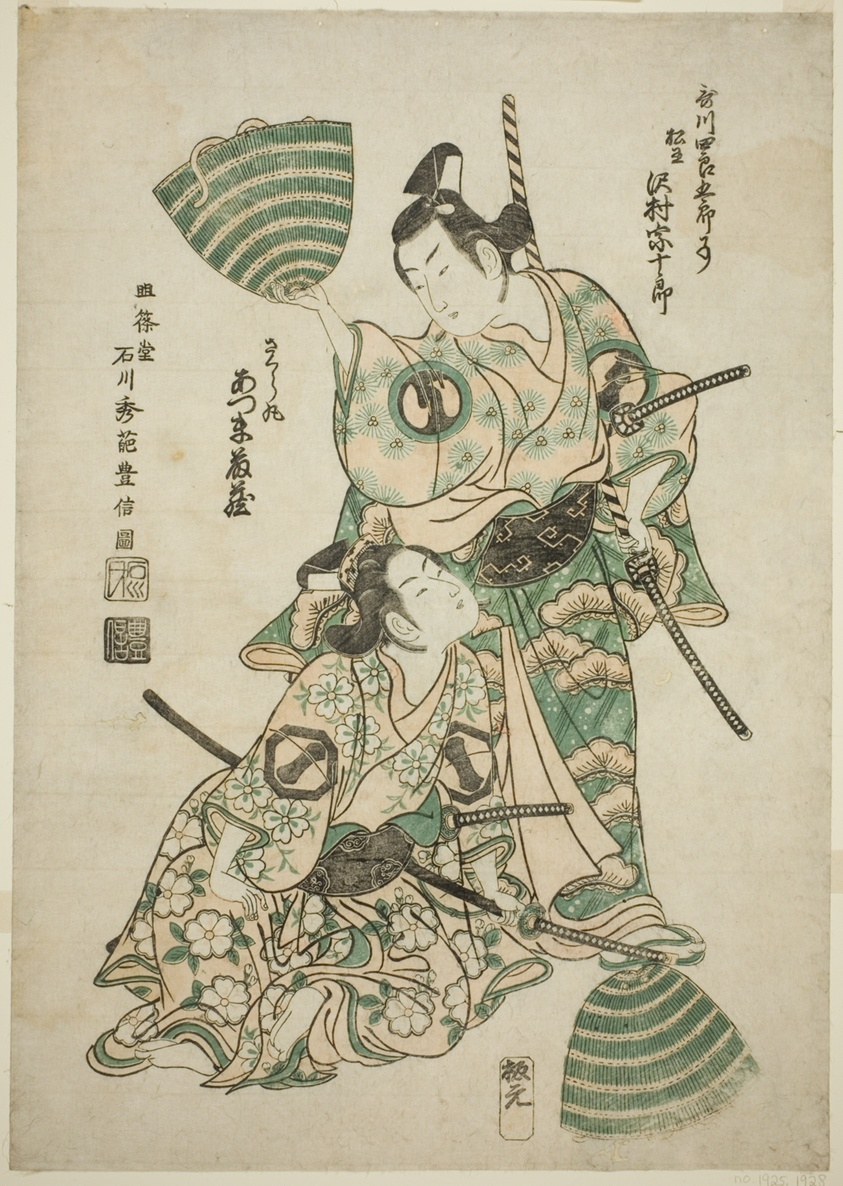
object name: Print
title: The Actor Sawamura Sojuro II (formerly Utagawa Shirogoro) as Matsuomaru and Azumo Tozo I as Sakuramaru in the play "Sugawara Denju Tenarai Kagami," performed at the Morita Theater, 1750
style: Japanese (culture or style)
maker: Ishikawa Toyonobu (Japanese, 1711-1785)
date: 1750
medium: Color woodblock print; oban, benizuri-e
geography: Japan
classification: woodblock print; print; asian art